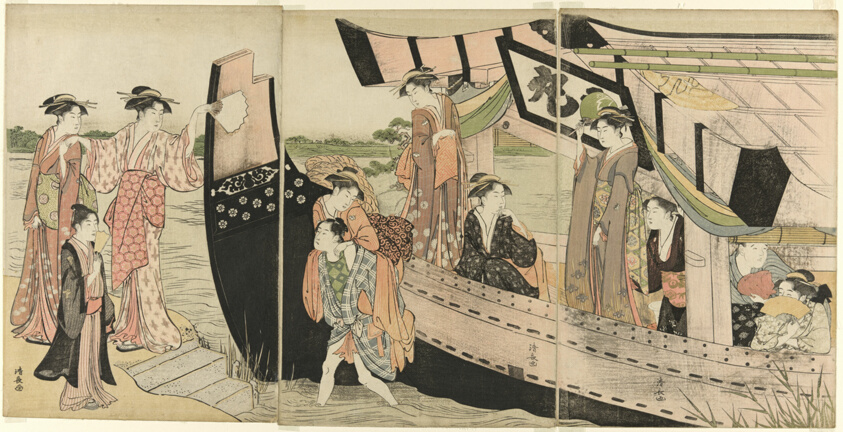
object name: Print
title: Women Coming Ashore from a Pleasure Boat on the Sumida River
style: Japanese (culture or style)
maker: Torii Kiyonaga (Japanese, 1752-1815)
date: c. 1785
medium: Color woodblock print; oban triptych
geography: Japan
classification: woodblock print; print; asian art